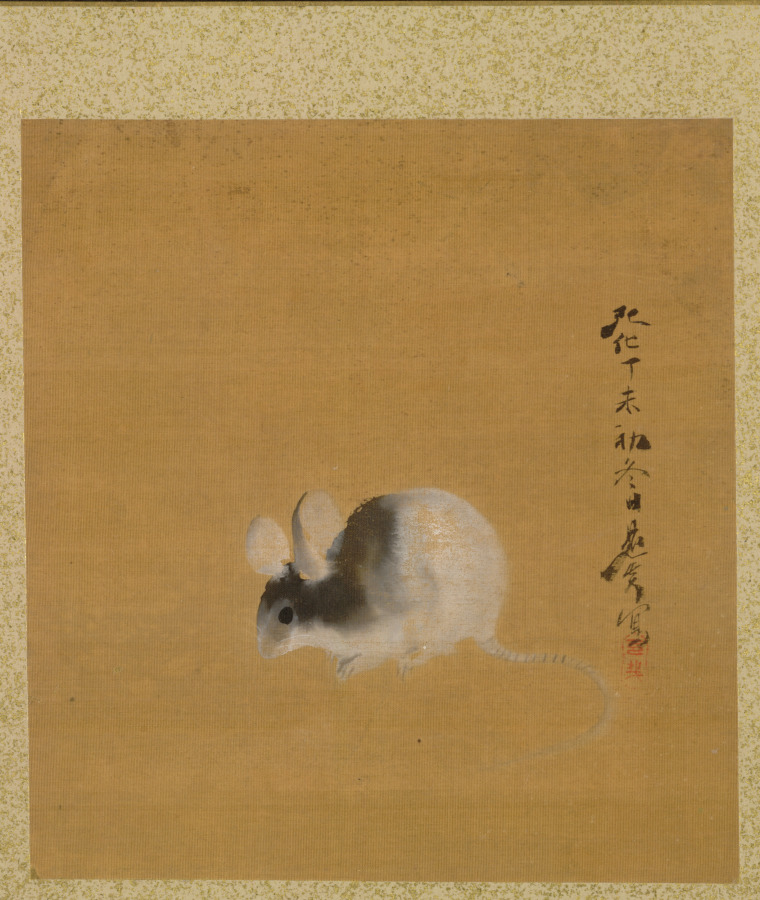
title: Mouse from Album of Paintings by the Venerable Zeshin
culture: Japan, Edo period (1615–1868)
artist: Shibata Zeshin (Japanese, 1807–1891)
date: 1847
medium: leaf in accordion-style album; ink, color, and gold on silk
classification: Bound Volume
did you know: The artist signed and dated this painting, indicating that he painted it on an early winter's day.